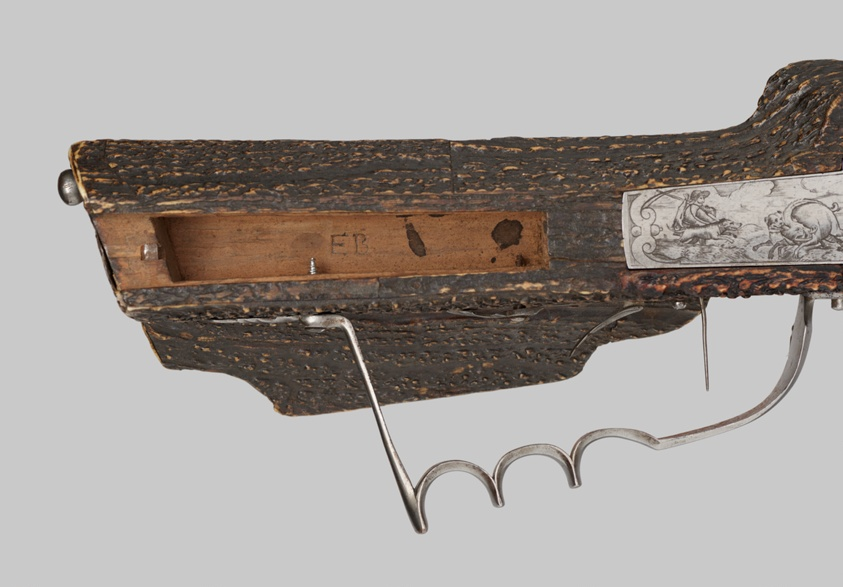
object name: Arms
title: Wheellock Rifle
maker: Elias Becker (German, Augsburg active 1633-1673); Augsburg, Germany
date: c. 1670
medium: Steel, staghorn, cherry wood, beech wood, gilt brass, copper, and enamel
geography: Augsburg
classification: firearm-long gun; arms; decorative arts; european decorative arts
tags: arms